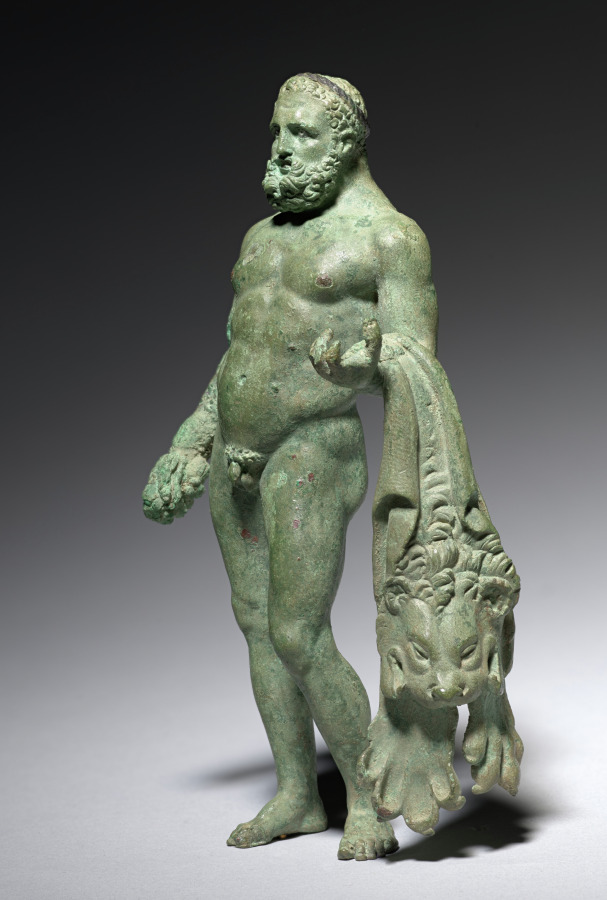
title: Hercules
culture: Italy, Rome, Early Imperial period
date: c. 30 BCE–20 CE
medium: bronze with silver and copper inlays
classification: Sculpture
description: This bronze statuette is a nude figure of the hero Hercules. He stands in a contrapposto pose, with the majority of his weight on one leg. Over his left arm, Hercules holds the skin of the Nemean Lion, having slayed the beast as part of his Twelve Labors and now carrying the pelt as a trophy. Although now mostly lost, Hercules once held his signature wooden club in his right hand. Roman artists often portrayed Hercules as middle-aged, as though greater maturity would increase his power and virility.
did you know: Hercules is the Roman name for the classical hero known in Greek as Herakles.